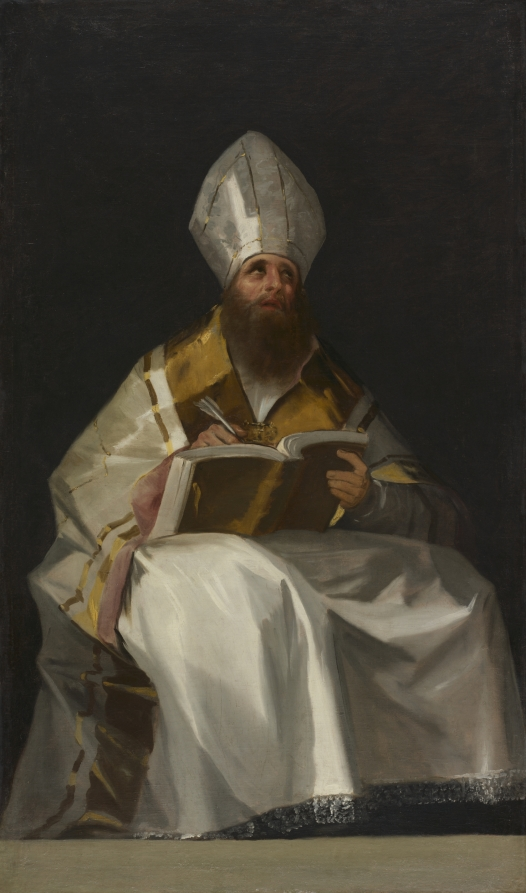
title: Saint Ambrose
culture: Spain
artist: Francisco de Goya (Spanish, 1746–1828)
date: c. 1796–99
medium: oil on canvas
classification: Painting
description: This work belongs to a series depicting Ambrose, Jerome, Augustine, and Gregory, key figures of early Catholicism. Saint Ambrose (about AD 340–391), the bishop of Milan, resolved important theological conflicts within the church and worked effectively with advocates of Roman paganism. The low viewpoint and large scale suggest that this painting hung high on the wall of a religious institution, but its original location remains unknown. In the late 1700s, Spain expelled all the Jesuits and sparked a transformation of the church. Many of these reformers turned back to early church history for inspiration, and this painting was probably commissioned by one of these new organizations.